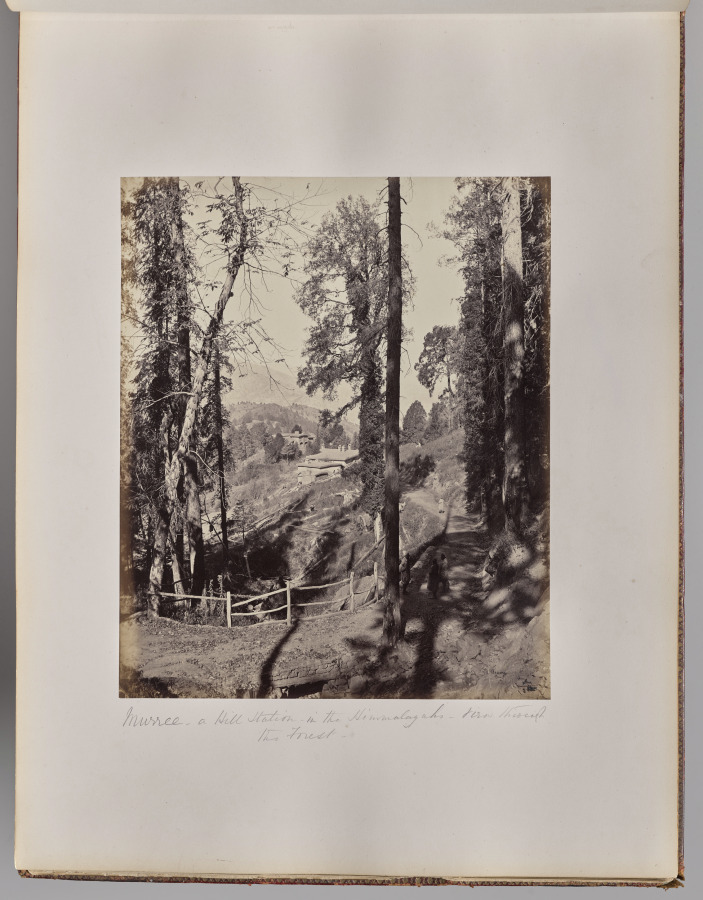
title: Murree. A Hill Station in the Himmalayahs, View Through the Forest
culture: England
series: Photographs of Northern India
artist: Samuel Bourne (British, 1834–1912)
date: 1863–70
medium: albumen print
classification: Photograph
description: The 50 images in this album, all taken in the 1860s, move from the hill towns of the Himalayas down to cities including Lahore (now in Pakistan), Delhi, Lucknow, Agra, Benares (now Varansi), and Calcutta (now Kolkata). Architectural studies of major monuments offer valuable historical records of what sites such as the Taj Mahal and the imperial mosque of the Mughal emperors in Delhi looked like before twentieth-century restorations.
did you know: Samuel Bourne, the author of most the images in this album, was a banker in England before he moved to India to become a professional photographer.